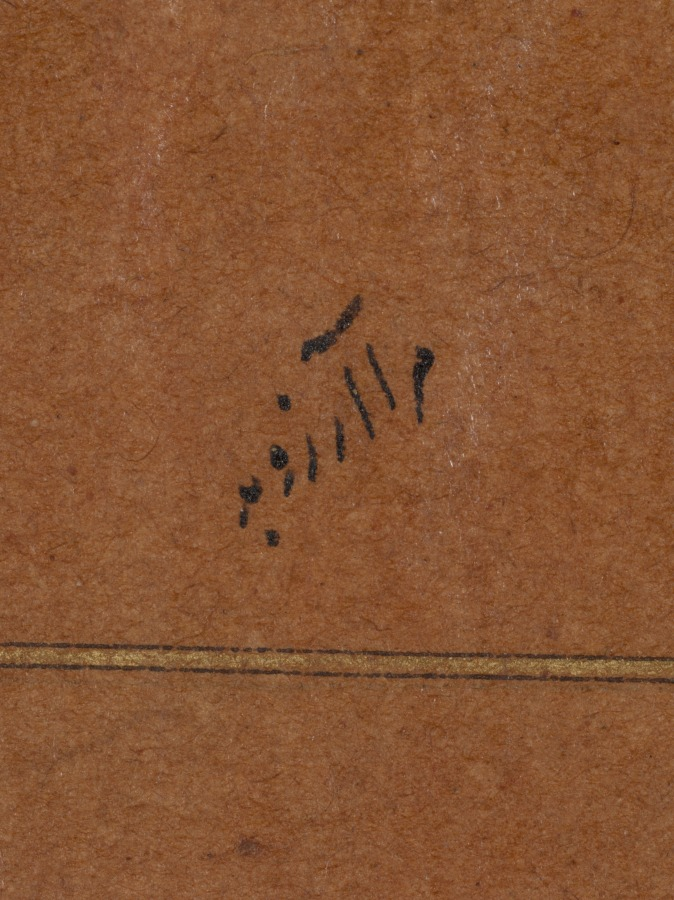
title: Text of Rustam and Suhrab, from the Shah-nama of Firdausi (Persian, c. 934–1020) (verso)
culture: India, Bijapur, Deccan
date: c. 1610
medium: Gum tempera, ink, and gold on paper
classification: Painting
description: This page of text from the jewel-like copy of the Shah-nama made in the southern Indian city of Bijapur describes the events leading to Rustam’s accidental slaying of his own son Suhrab. The larger text in red is a chapter heading, which reads: “The single combat between Rustam and Suhrab once more.”